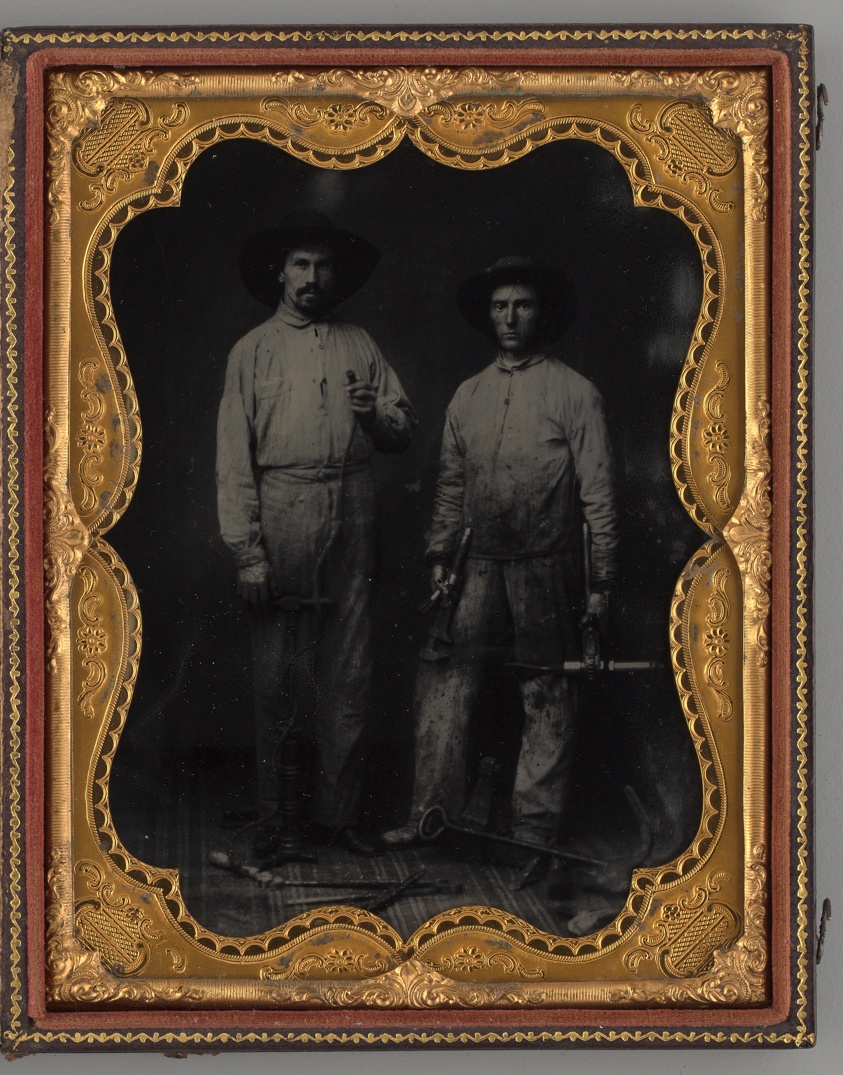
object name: Photograph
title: Untitled (Portrait of Standing Two Men Holding Tools)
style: 19th century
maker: Jesse Harrison Whitehurst (American, 1819–1875)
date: 1875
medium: Tintype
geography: United States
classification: portrait; tintype; portrait; photograph; photographic process; photography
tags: lundberg collection, labor, men, portrait, portraits, portraits: male subject, portraits: multiple subjects